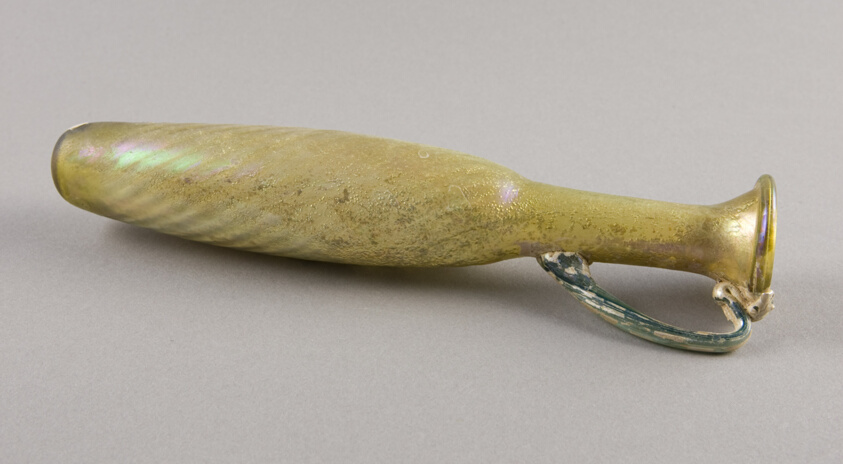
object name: Vessel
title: Flask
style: syrian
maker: Roman; Levant or Syria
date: 2nd-3rd century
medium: Glass, blown technique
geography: Syria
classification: glass; vessel; ancient art